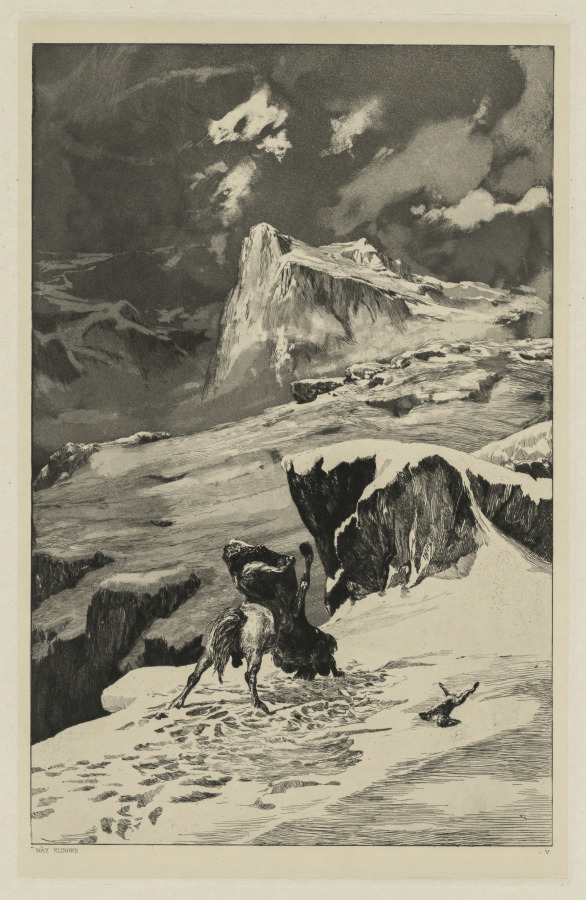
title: Intermezzo: Battling Centaurs (Opus IV, 4)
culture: Germany, 20th century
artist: Max Klinger (German, 1857–1920)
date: 1881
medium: etching and aquatint on chine collé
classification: Print